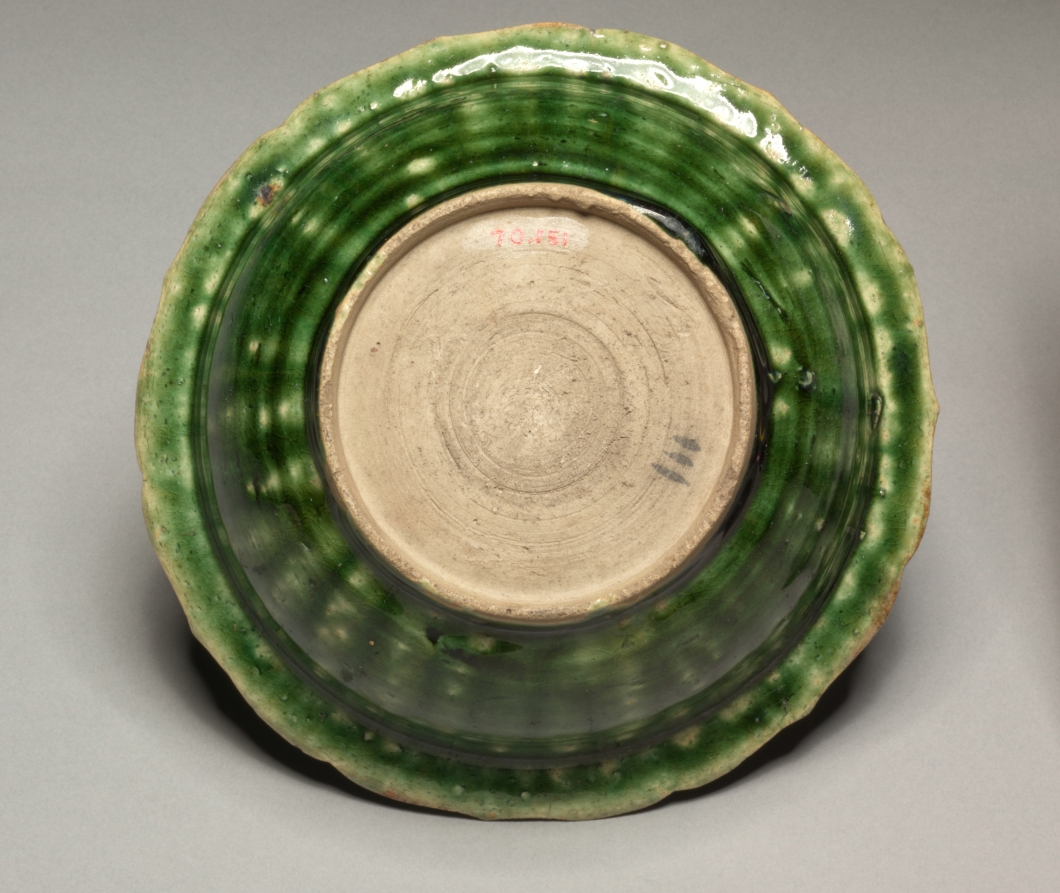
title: Dish with Incised Design of a Rider on a Mule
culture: Japan, Momoyama period (1573–1615)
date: c. 1600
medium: Buff stoneware covered with copper-green glaze (Mino ware, Oribe type)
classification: Ceramic